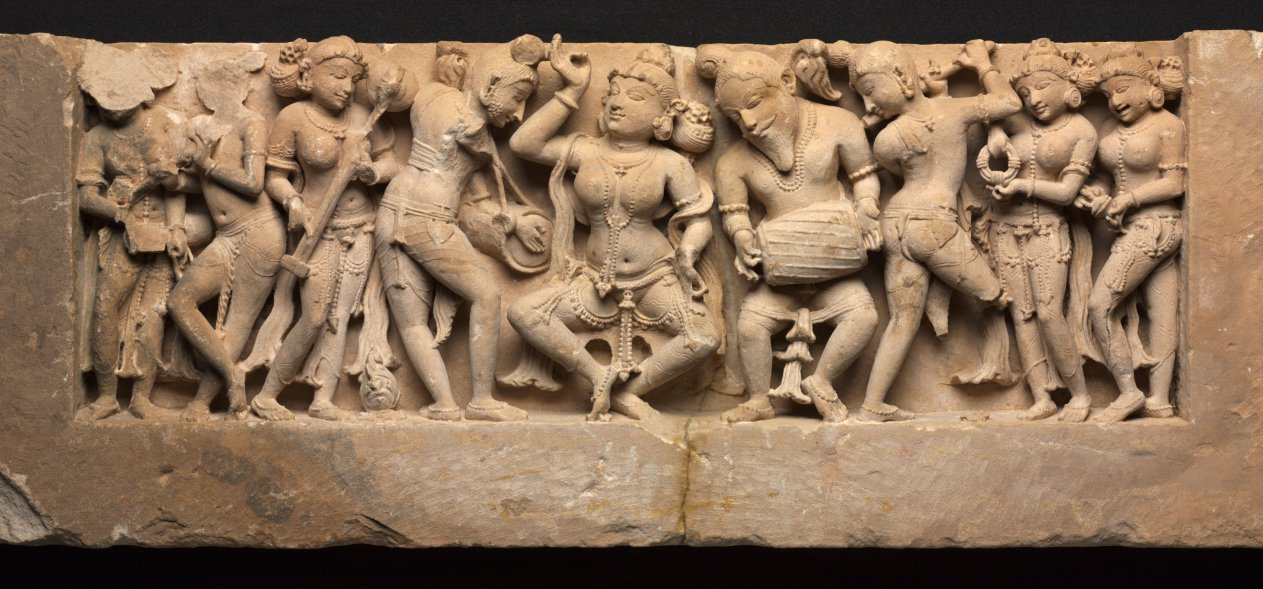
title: Frieze with Dancer and Musicians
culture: Northwestern India, Rajasthan, Sikar, Harshagiri, 10th century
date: c. 973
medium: sandstone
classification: Sculpture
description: A dancer, who strikes a pose in the center, is accompanied by a full orchestra of musicians in lively variegated poses. At the far left, a woman plays the cymbals, her mouth open in song. Twisting turning postures of figures wrought in high relief with little background space behind them are characteristics of Indian sculpture from the medieval period. Music and dance were important components of devotional temple activities; they were considered as pleasing to the divinity and attractive for devotees as the works of sculpture and architecture.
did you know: The twisting, dynamic postures of the musicians in this frieze may visually echo the joyful music they are playing together.